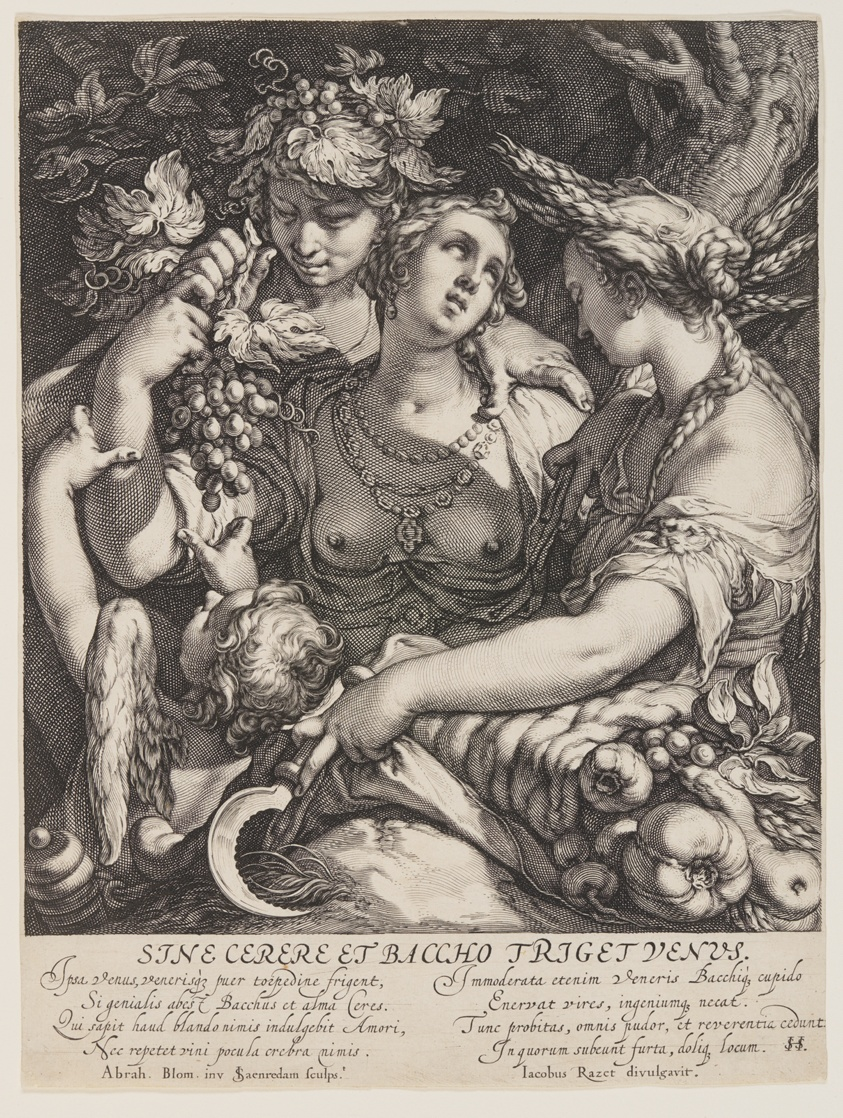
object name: Print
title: Sine Cerere et Baccho Friget Venus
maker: Jan Saenredam (Dutch, 1565–1607); after Abraham Bloemaert (Dutch, 1566–1651)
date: c. 1600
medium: Engraving on ivory laid paper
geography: Netherlands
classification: engraving; paper; print; prints and drawing